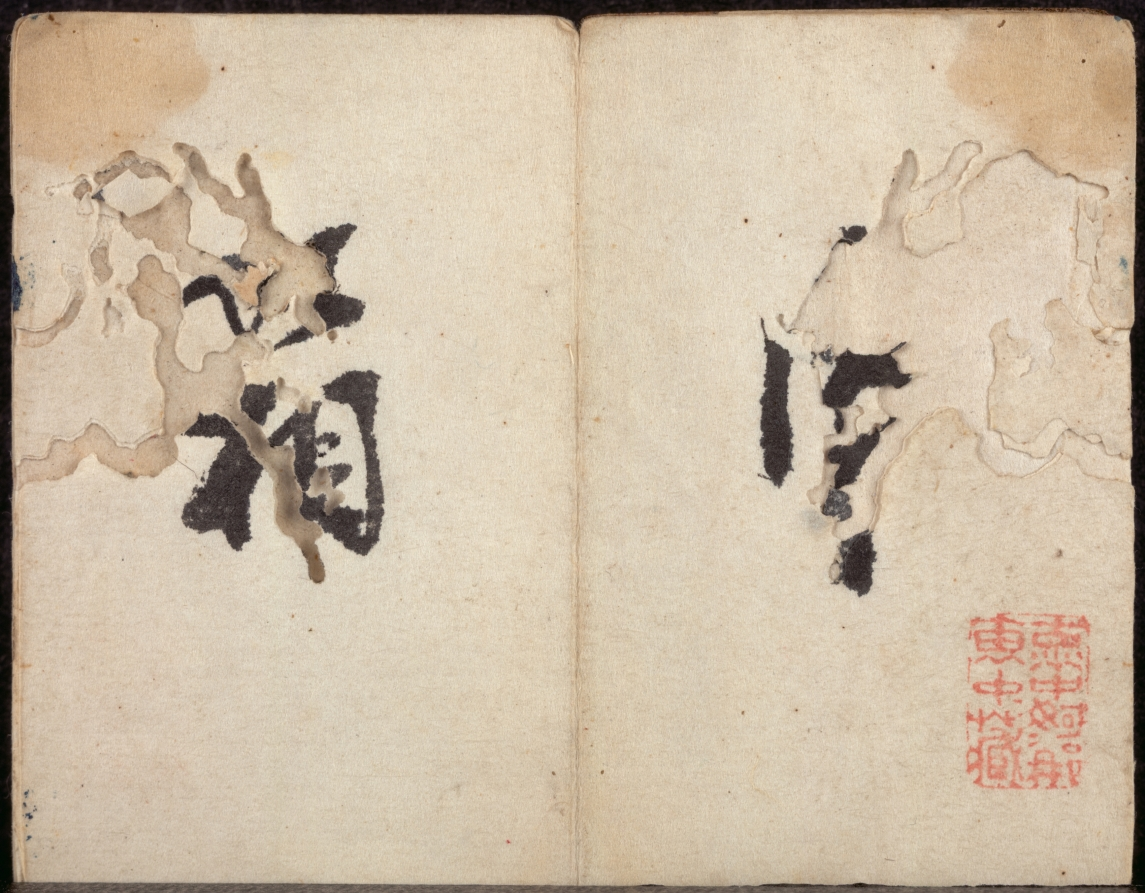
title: Miniature Album with Figures and Landscape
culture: China, Qing dynasty (1644–1911), Qianlong reign (1736–95)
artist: Zeng Yandong (Chinese, c. 1751–1827)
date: 1822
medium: Album of twelve leaves, ink and color on paper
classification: Painting